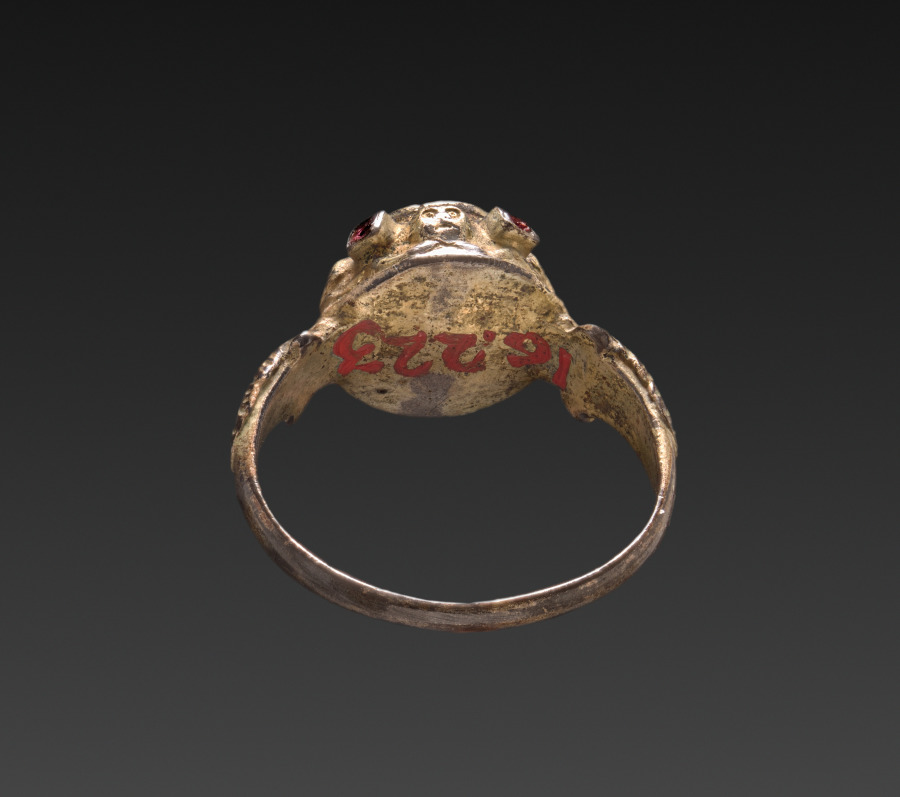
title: Ring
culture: Germany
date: 1500–1699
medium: copper with gold gilding, garnet(?)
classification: Jewelry